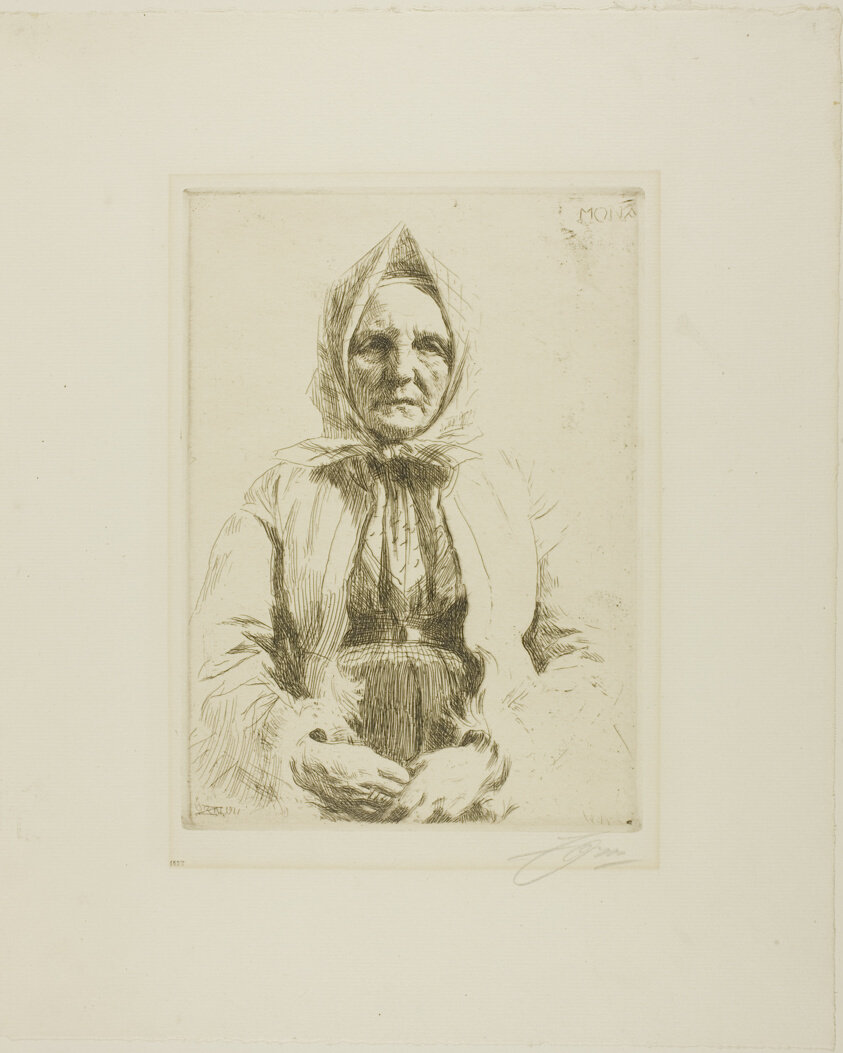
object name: Print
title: Mona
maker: Anders Zorn (Swedish, 1860-1920)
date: 1911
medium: Etching on ivory laid paper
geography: Sweden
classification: etching; print; prints and drawing